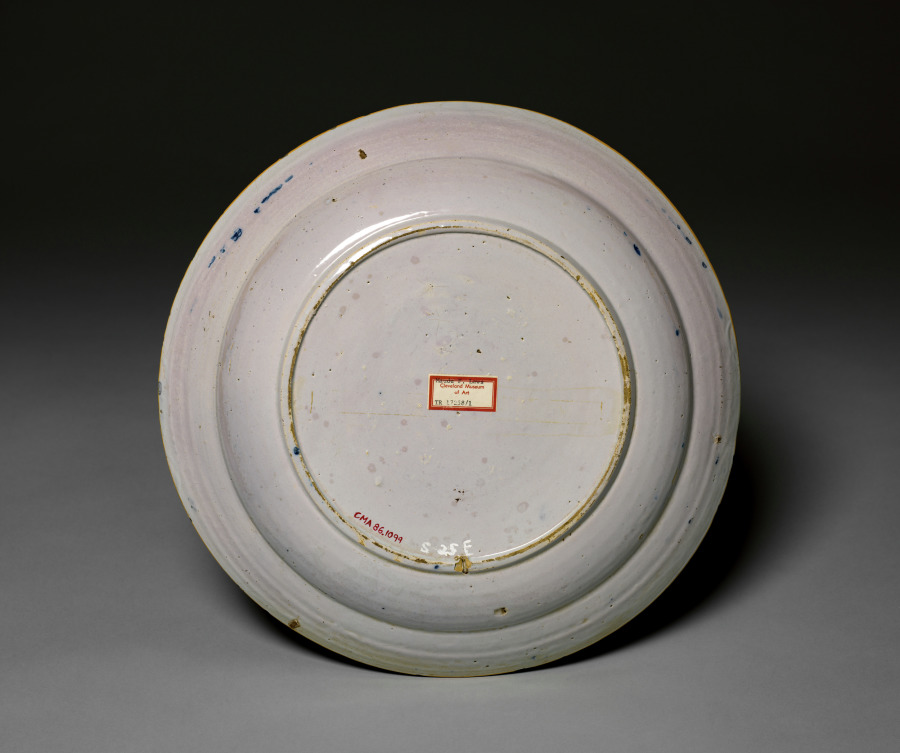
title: Delftware Plate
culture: Netherlands, Holland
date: c. 1750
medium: glazed ceramic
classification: Ceramic